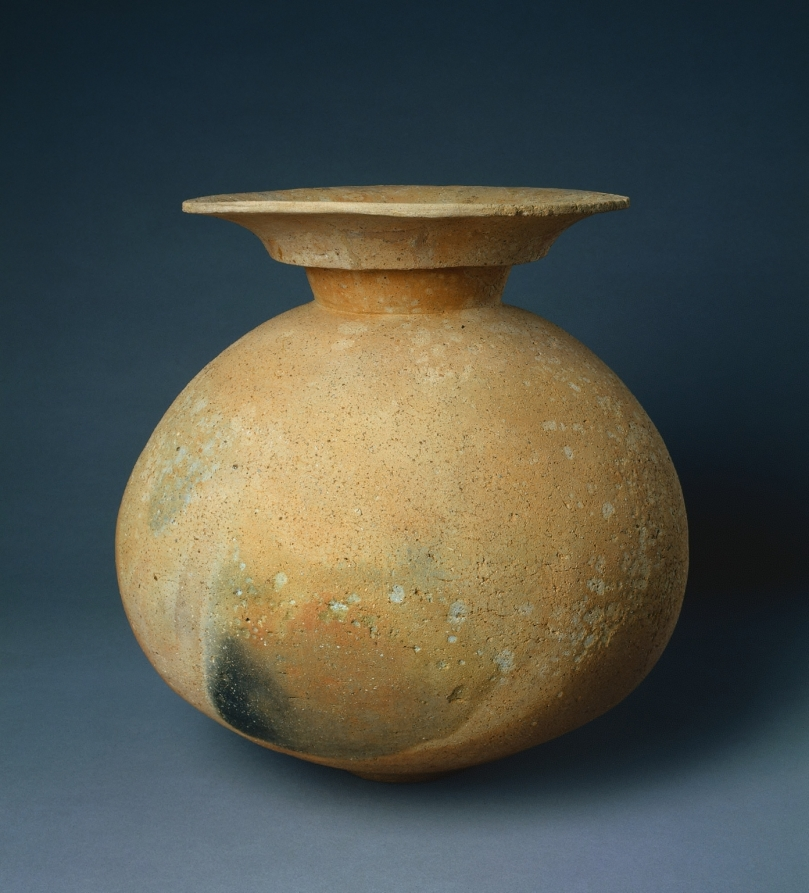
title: Vessel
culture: Japan, Yayoi period (c. 300 BCE–300 CE)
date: 300s BCE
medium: Earthenware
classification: Ceramic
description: Pottery existed for thousands of years in Japan before the Yayoi period, but the development of wet rice agriculture and permanent settlements by previously nomadic communities changed its form significantly. Yayoi period pots were aimed more at long-term storage than those from prior millennia. Their smooth, unadorned surfaces and round shapes also reflect the style of contemporaneous works from the Korean peninsula, indicating the strong ties between Japanese communities and Korean kingdoms at the time.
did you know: Yayoi ceramics, like this example, were likely made by laying one coil of clay on top of another to form the body of the vessel.